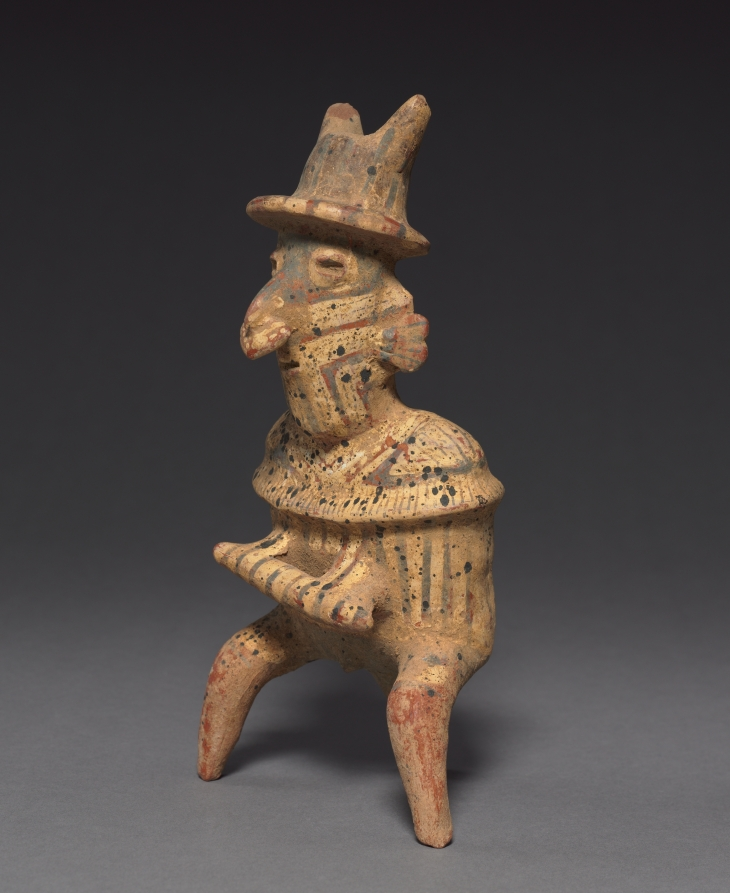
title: Seated Male Holding Chief’s Baton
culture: Mesoamerica, West Mexico, Nayarit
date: 200 BCE–300 CE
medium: ceramic, pigment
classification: Ceramic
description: The ancient artists of West Mexico specialized in ceramic sculptures in a range of sizes, investing their creations with a warm humanity regardless of scale. This tripod-shaped figure represents a well-dressed chief holding a baton of authority.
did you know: This tripod-shaped figure represents a well-dressed chief holding a baton of authority.